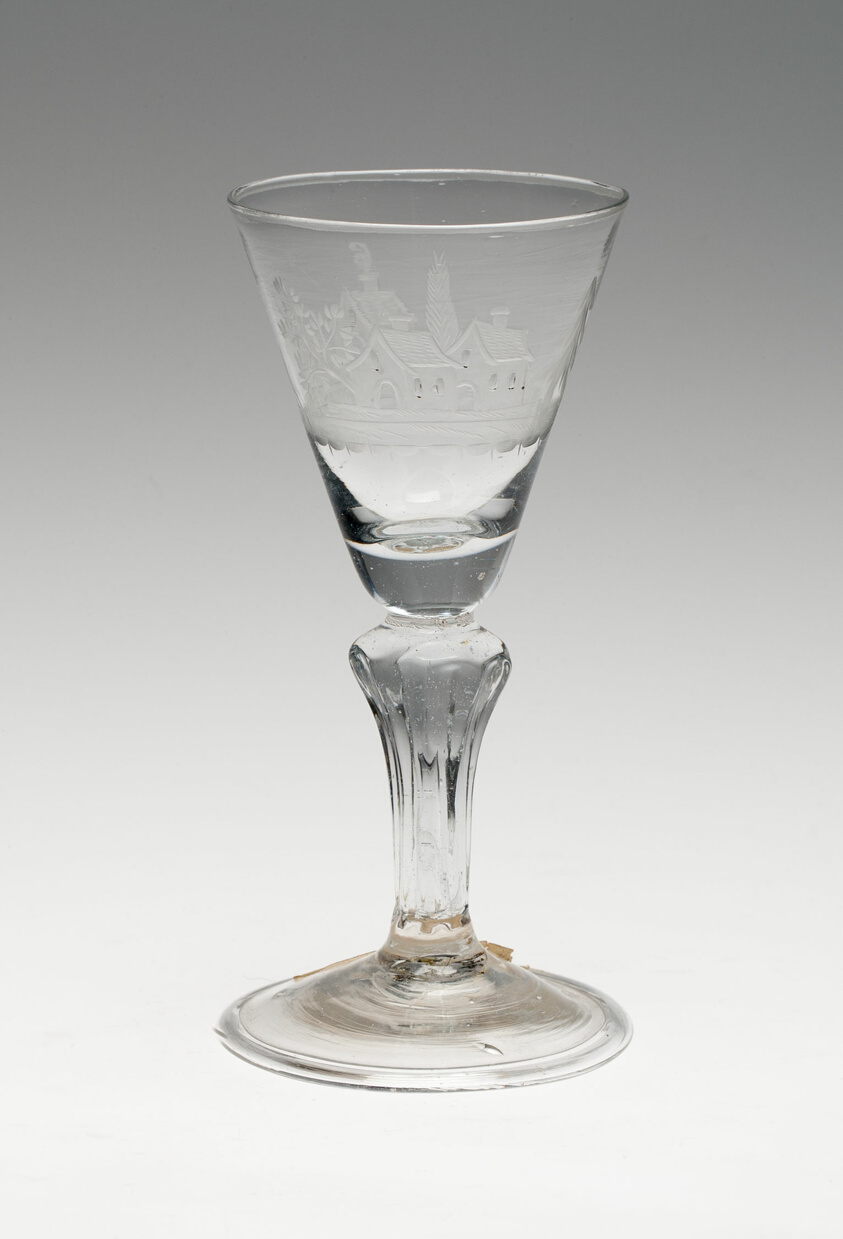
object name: Glass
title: Wine Glass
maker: Germany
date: c. 1750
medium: Glass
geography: Germany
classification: drinking vessel; glass; european decorative arts